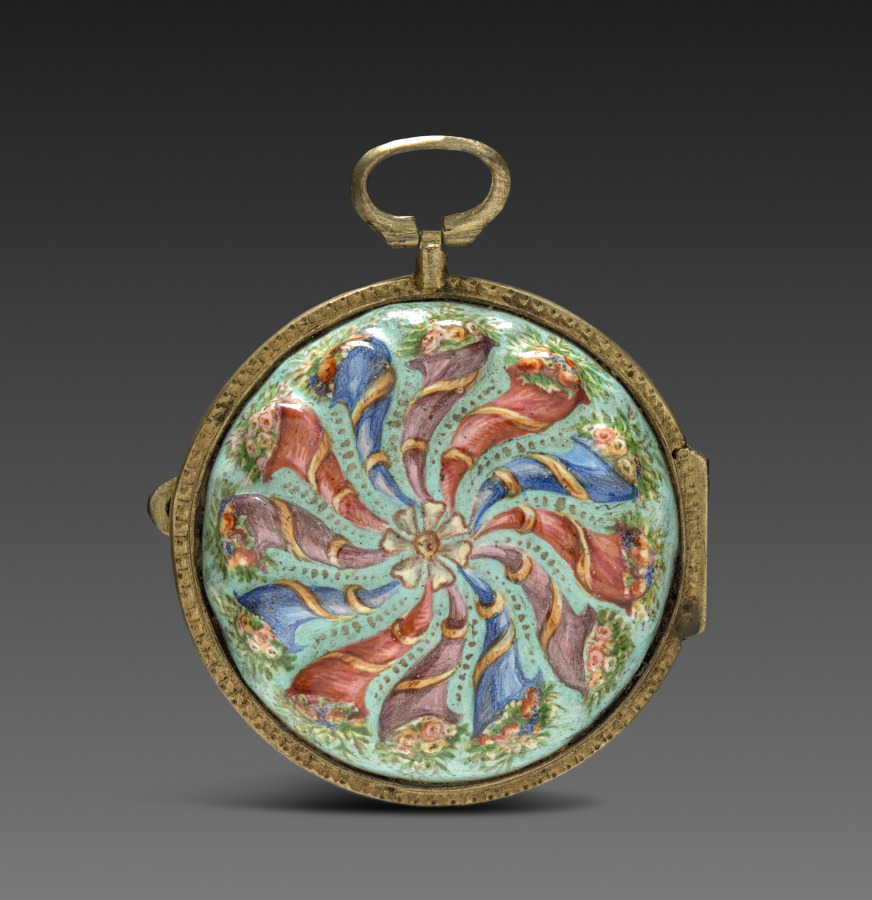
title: Watch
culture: France, Paris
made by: Marchand (French)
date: late 1700s - early 1800s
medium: enameled case mounted in engraved gilded metal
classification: Jewelry